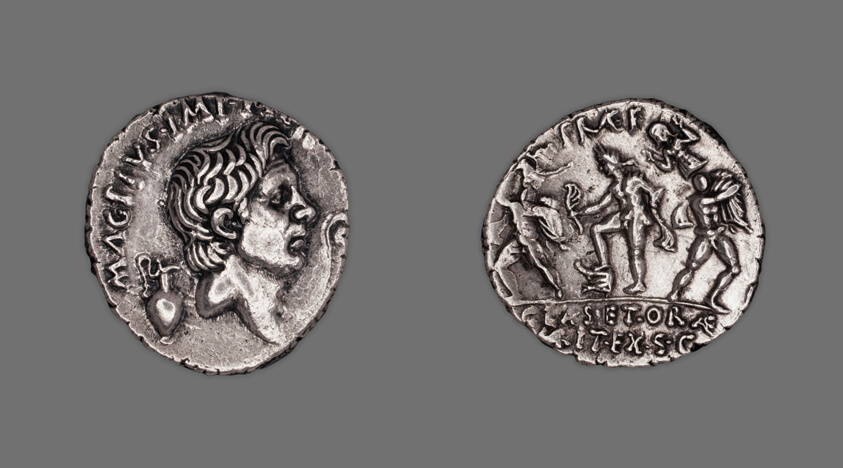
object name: Coin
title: Denarius (Coin) Portraying Pompey the Great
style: roman (ancient, style or period), ancient, republic period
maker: Roman, minted in Sicily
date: 42-40 BCE, issued by Roman Republic, Sextus Pompeius Magnus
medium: Silver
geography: Sicily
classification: coin; ancient art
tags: portraits, mythology